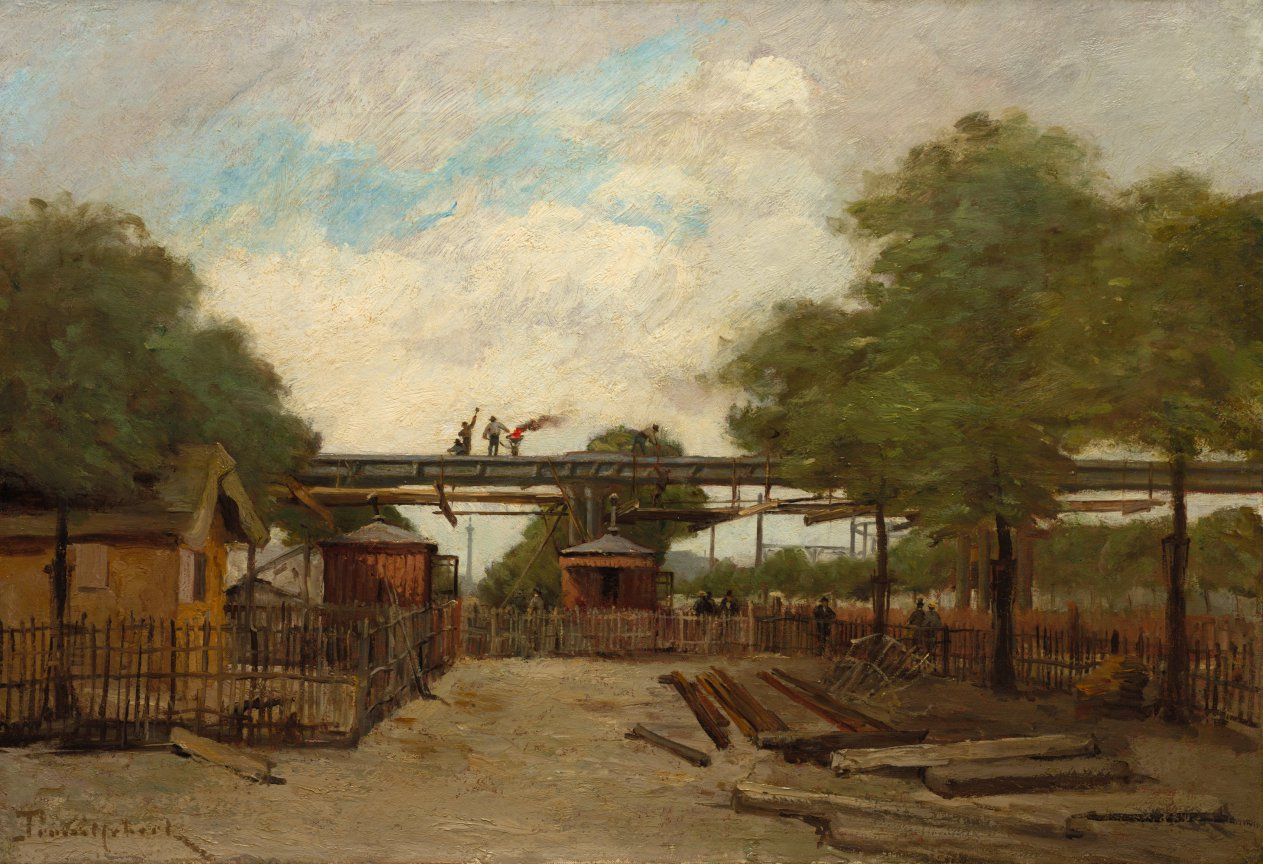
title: Construction of an Elevated Railway: Bridge over the Cours de Vincennes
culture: France, 19th century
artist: Paul Désiré Trouillebert (French, 1829–1900)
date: 1888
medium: oil on fabric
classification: Painting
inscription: Signed lower left: Trouillebert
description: Conceived in 1851, after Napoleon III came to power, the railway encircling Paris was intended to transport merchandise and, eventually, passengers. The railway represented a new convenience, but measures were needed to ensure the safety of other traffic. The numerous railway crossings included in the initial plans turned out to be a source of fatal accidents. To remedy the problem, the platforms and retaining walls were to be raised at the most dangerous spots. The Cours de Vincennes, in the eastern part of Paris, had been one of the deadliest intersections. The work on an elevated railway bridge over this street, which is depicted here, was completed in February 1889. Trouillebert concentrated on portraits until about 1881, when he began to focus on landscapes. He also painted everyday scenes and nudes. He was commissioned by Edme Piot, a public works contractor, to paint this and four related views of the Paris railway construction.